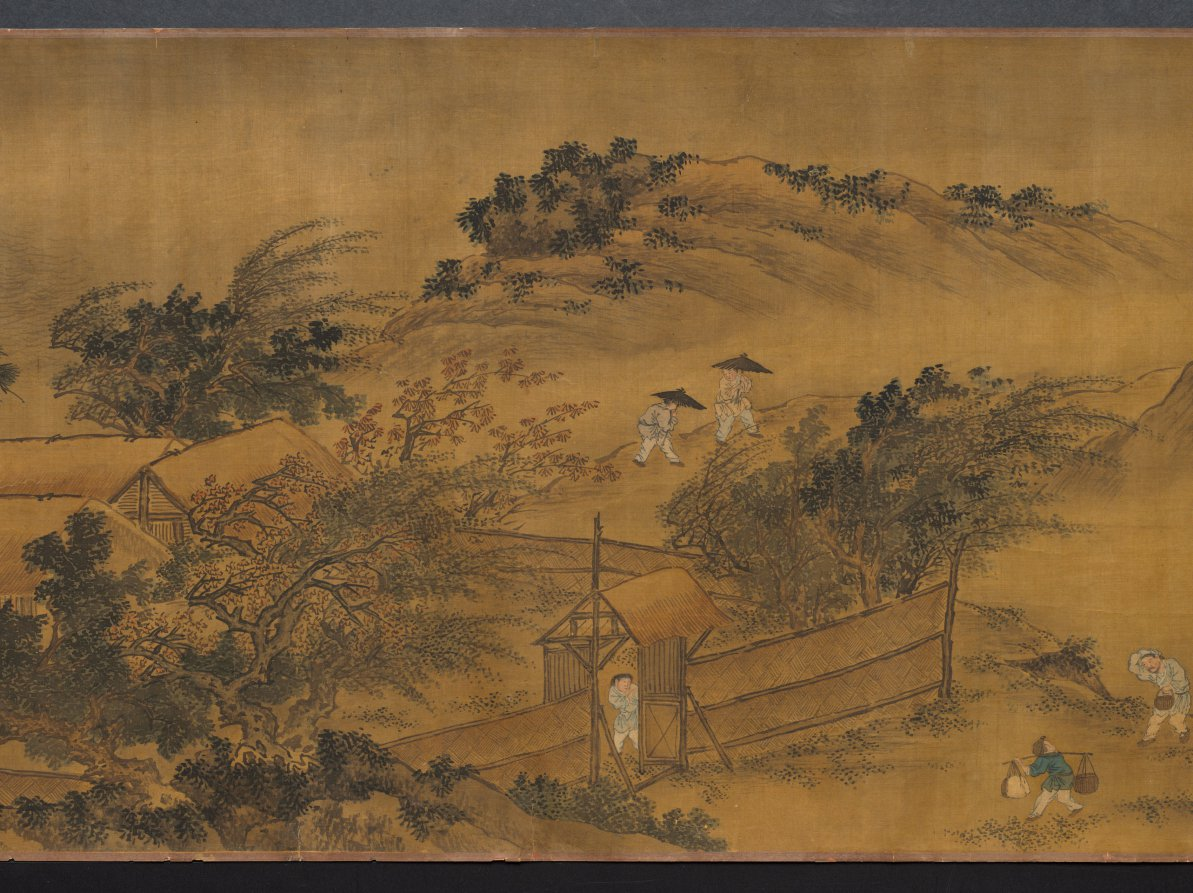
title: Returning to the Village in a Rainstorm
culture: China, Ming dynasty (1368–1644)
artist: Xie Shichen (Chinese, 1487–after 1567)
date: 1530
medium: Handscroll; ink and light color on silk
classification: Painting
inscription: 風雨歸村圖 嘉靖庚寅秋日樗仙謝時臣. [印] 謝時臣印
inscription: 3 additional seals unidentified.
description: This scroll depicts a wind- and rainswept landscape with figures in the countryside struggling against a late summer monsoon rainstorm. Such weather was familiar to residents of the lower Yangzi delta. Xie Shichen spent most of his life in the Suzhou area. Details of his career are scant, but his surviving works suggest that he made his living as a professional painter. This painting conveys drama and anecdotal observations, characteristic of Zhe school paintings, such as the one by Lü Wenying, CMA 1970.76.